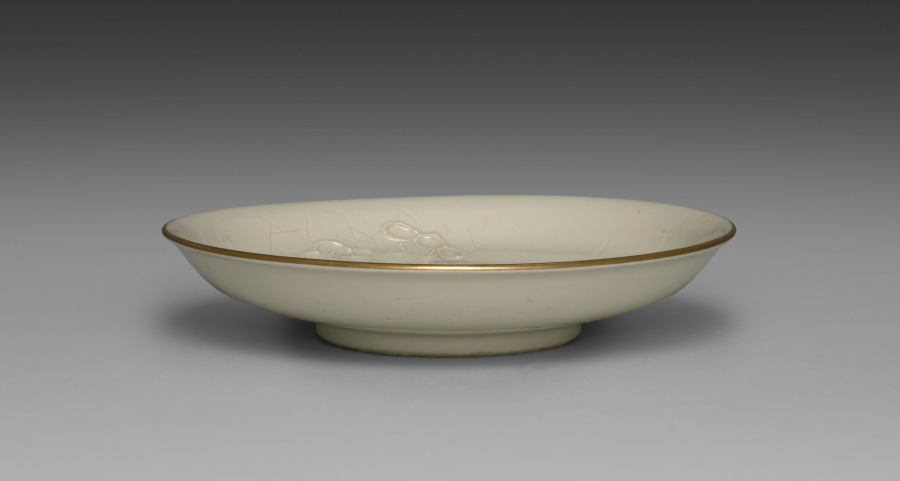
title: Medium-sized Dish from Dining Set with Plum Blossoms and Cracked-Ice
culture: Japan, Meiji period (1868–1912)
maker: Seifū Yohei II (Japanese, 1844–1878)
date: c. 1875–78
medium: Porcelain with molded designs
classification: Ceramic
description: Each item in this set has a delicate low-relief design of flowering plum branches over scattered, intersecting lines meant to resemble the cracked-ice surface of a frozen body of water and is signed on the base in gold pigment. While Yohei II produced many fine works in underglaze blue, like those produced by Kiyomizu Shichibei, he also made works in quite different styles later in his career, from the early 1870 s. In 1873, he was appointed purveyor to the Industrial Center of Kyoto Prefecture, a designation associated with Kyoto’s efforts to reach an international market through the port of Kobe; and from 1875 until his death, he was involved in national-level projects to present Japanese ceramics across the world. It was during this period that Yohei III was apprenticed to Yohei II, and it has been suggested that this set may in fact be an early example of Yohei III’s work, which he signed with his teacher’s name. Decorated with flowers resembling Japanese textile motifs, the set calls to mind the design of Yohei II’s pair of vases with plum blossoms in the Victoria and Albert Museum. Here, the elaborate trees created for a formal public exhibition setting have been translated into the approachable blossoms of the genteel domestic environment. While the designs are consistent across the pieces, each raised flower petal and pistil and each incised line in the ice was done by hand, so the cups, bowls, and dishes are similar yet unique. The bottoms of two boxes once identified the set’s owner, but the information has been deliberately obscured with black ink. However, inscriptions still visible appear to indicate two occasions, once at the end of July 1886 , and once again in June 1916 , when parts of the set were requested from Hokura in Niigata Prefecture. The location corresponds to a neighborhood in the present-day city of Jōetsu. The surname Tsuji 辻 also appears on a paper tag affixed to one of the box cloths. Future research may possibly reveal more about their provenance. A vase by Yohei III in a private collection combines the formal grandeur of the Yohei II vases in the Victoria and Albert Museum with the gentler design of this dining set, placing flowering plum trees against soft, scalloped-edge clouds resembling those in golden screens.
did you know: The dining wares have a creamy white coloration that the four boxes containing them identify as Korean in style.